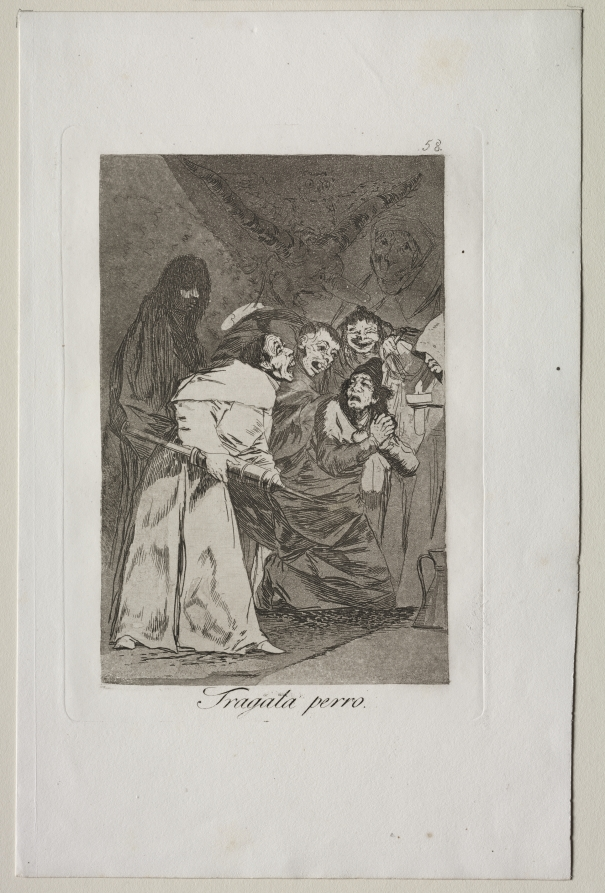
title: Swallow it, Dog!, Plate 58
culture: Spain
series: Los Caprichos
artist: Francisco de Goya (Spanish, 1746–1828)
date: 1799 (printed c. 1855)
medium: etching and aquatint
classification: Print